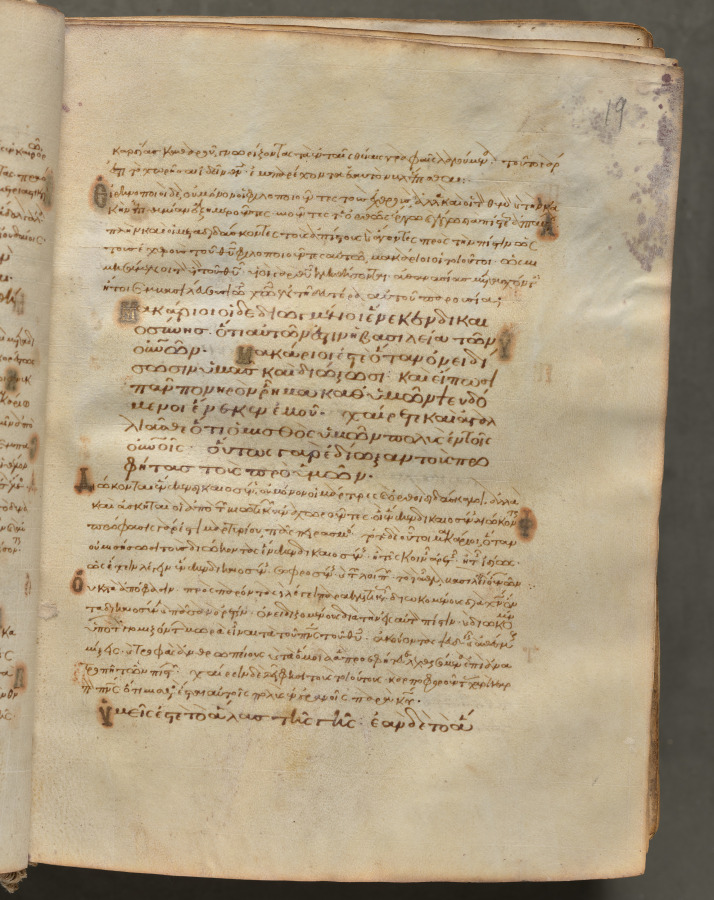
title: Text, folio 19 (recto), from a Gospel Book with Commentaries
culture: Byzantium, Constantinople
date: c. 1000–1100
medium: ink, tempera, and gold on vellum; leather binding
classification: Bound Volume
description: Each of the four gospels in this book opens on a page with brilliantly illuminated borders depicting the author of the text as well as birds-principally peacocks, symbols of the immortality of the soul-and fountains, representing the fountain of life and the salvation of the soul. This volume consists of 428 leaves with texts in Greek. Its level of sophistication suggests that it was probably written and decorated in a monastery in Constantinople.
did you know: Gospel Books were carried in procession through Byzantine churches.